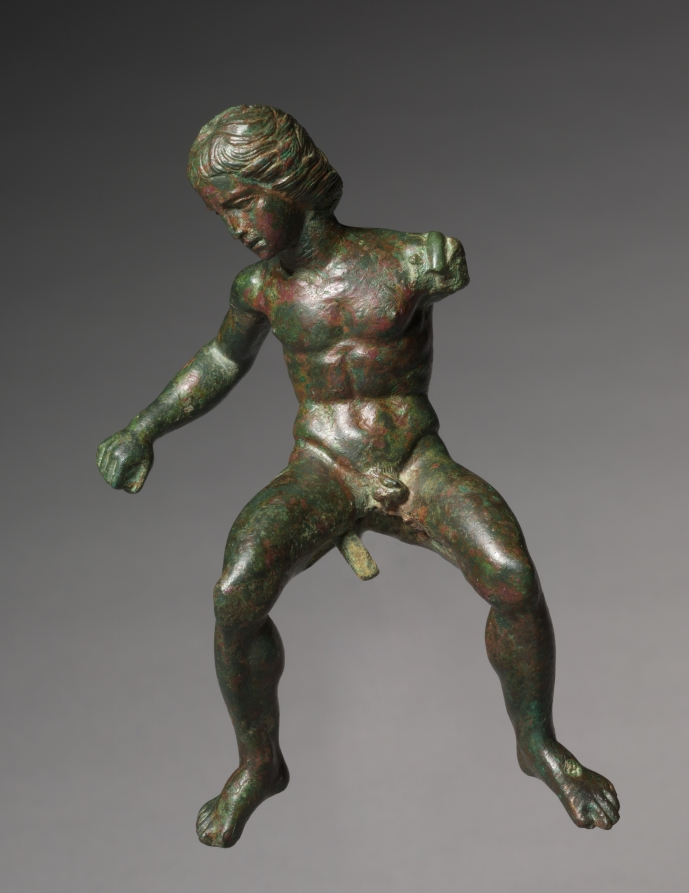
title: Rider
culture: Greece, perhaps from workshop of Tarentum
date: c. 400–375 BCE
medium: bronze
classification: Sculpture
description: Once mounted with pins upon his horse (now lost), this statuette depicts a young man participating in an equestrian race. The rider’s distinctive equipment is still barely visible: his right hand clutches the base of a goad to urge on his horse, and the first pleat of a cloak, the youth’s only covering, lays over his left shoulder.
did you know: Without stirrups, this rider’s heels turn inward to control his mount by pressing its flanks.